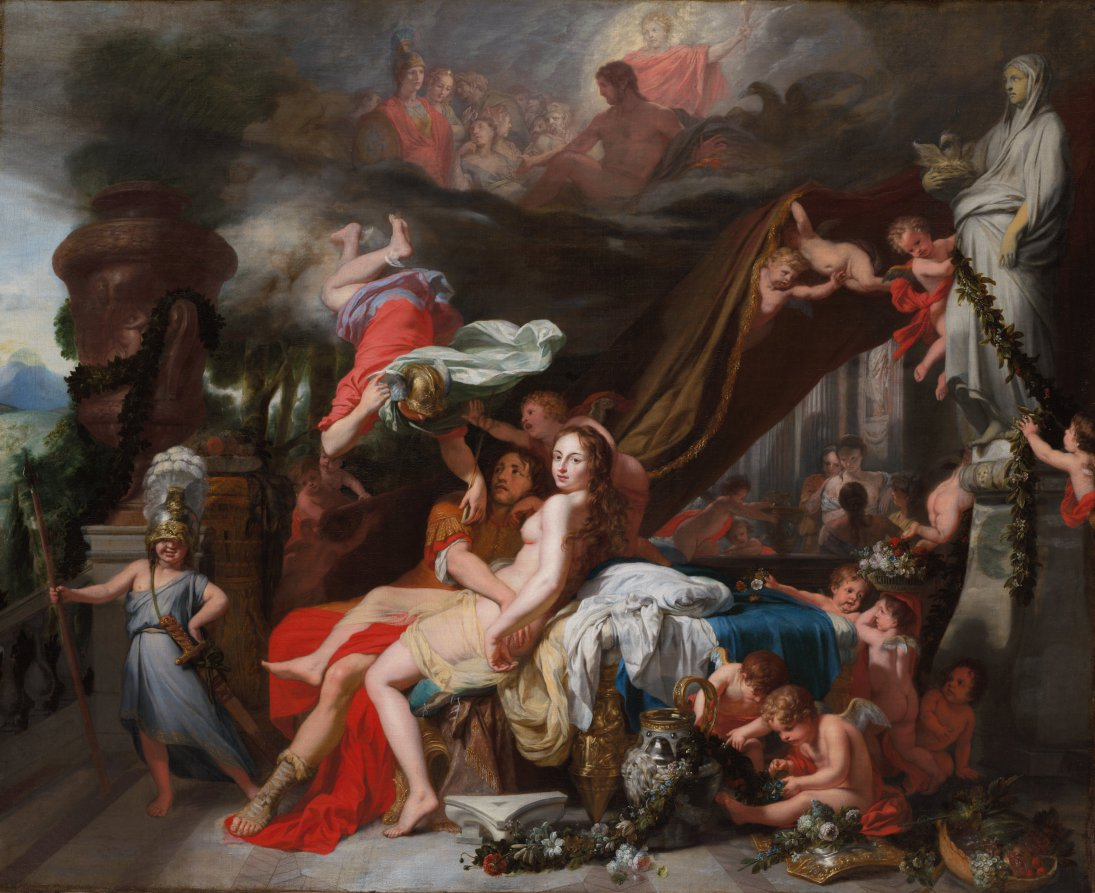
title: Hermes Ordering Calypso to Release Odysseus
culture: Netherlands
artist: Gerard de Lairesse (Flemish, 1641–1711)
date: c. 1670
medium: oil on canvas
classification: Painting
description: The Greek goddess Calypso held the hero Odysseus captive for seven years, preventing his return home from the Trojan War. Despite Calypso’s charms and the luxurious surroundings, Odysseus longed for his home and family, so the Olympian gods finally allowed his freedom. Here, the god Hermes swoops down to free Odysseus from Calypso’s embrace. De Lairesse, popularly known as the “Dutch Poussin,” introduced to the Netherlands a classicizing style influenced by artists of the French Academy.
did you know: Calypso, reclining on her bed, looks at us with the same charming smile she used on Odysseus.